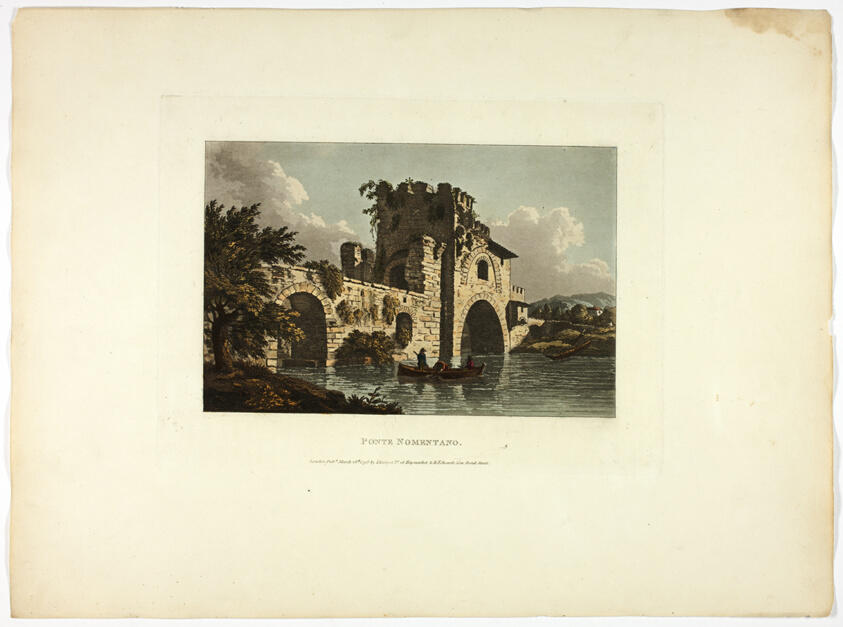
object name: Print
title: Ponte Nomentano, plate twenty-seven from Ruins of Rome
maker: M. Dubourg, (English, active 1786-1838); published by J. Merigot (Italian, Unknown)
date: published March 28, 1798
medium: Hand-colored aquatint on paper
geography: England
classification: aquatint; print; prints and drawing